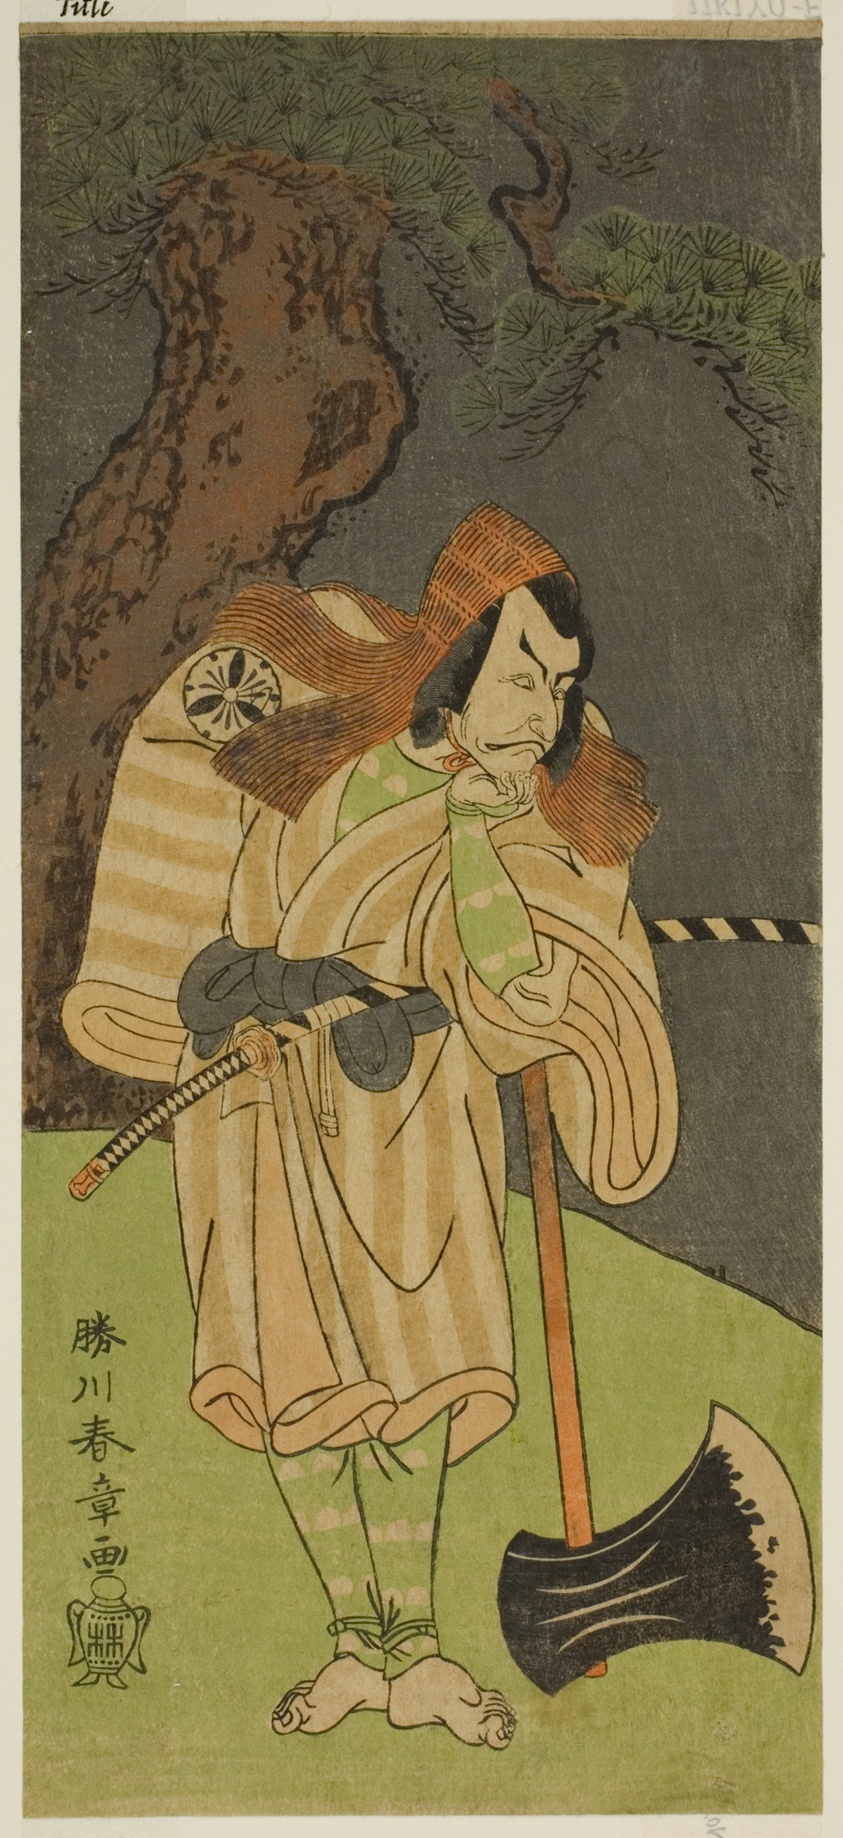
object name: Print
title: The Actor Matsumoto Koshiro II as Osada no Taro Kagemune Disguised as the Woodcutter Gankutsu no Gorozo in the Play Nue no Mori Ichiyo no Mato, Performed at the Nakamura Theater in the Eleventh Month, 1770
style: Japanese (culture or style)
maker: Katsukawa Shunsho 勝川 春章; Japanese, 1726-1792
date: c. 1770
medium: Color woodblock print; hosoban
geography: Japan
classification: woodblock print; print; asian art